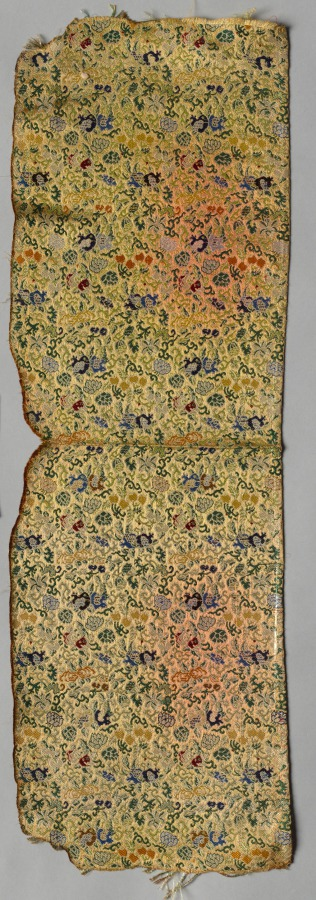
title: Fragment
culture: China, Qing dynasty (1644-1911)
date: 1800s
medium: Silk; damask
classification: Textile